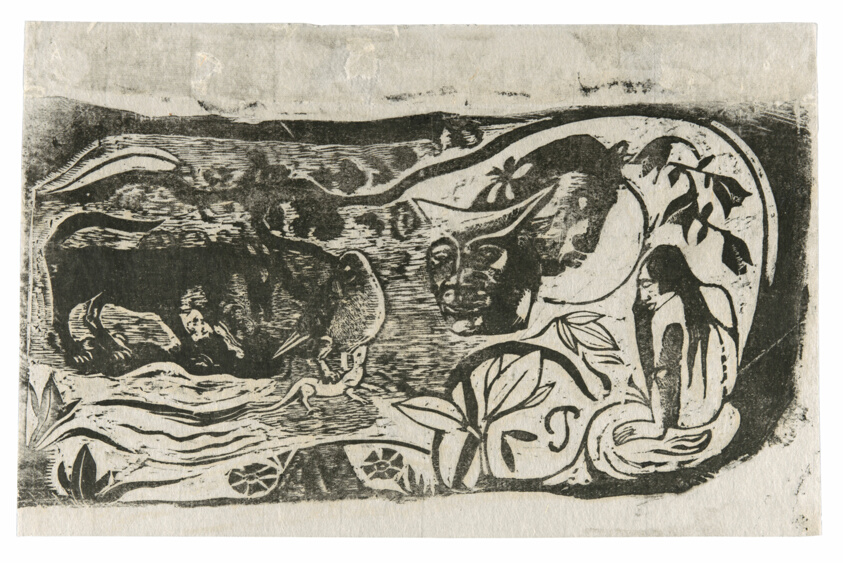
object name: Print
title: Plate with the Head of a Horned Devil, from the Suite of Late Wood-Block Prints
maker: Paul Gauguin (French, 1848-1903)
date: 1898/99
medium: Wood-block print, printed twice in black over pale yellow ocher ink, on thin ivory Japanese paper, partially laid down on white two-ply mat board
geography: France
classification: woodcut; print; prints and drawing